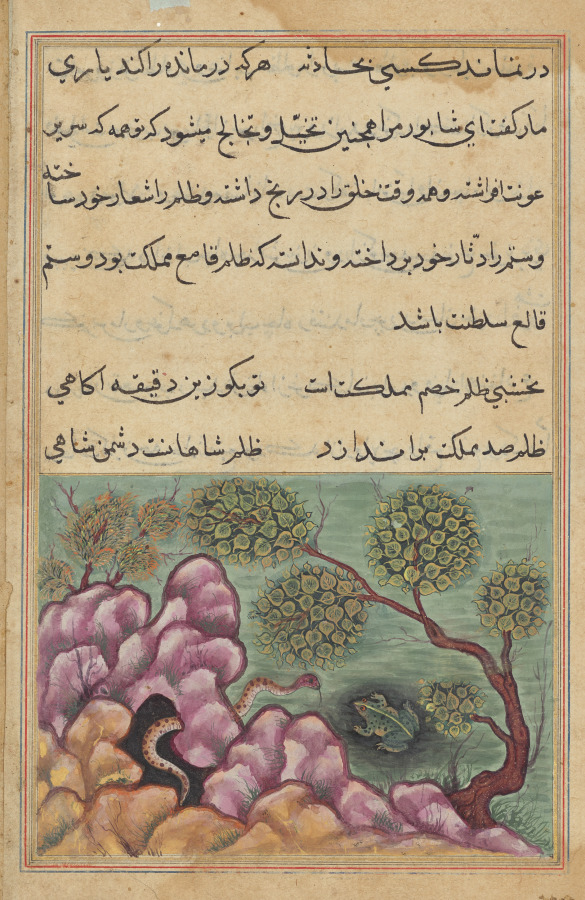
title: The dethroned frog Shapur seeks the help of the serpent, from a Tuti-nama (Tales of a Parrot): Twenth-sixth Night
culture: Mughal India, court of Akbar (reigned 1556–1605)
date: c. 1560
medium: gum tempera, ink, and gold on paper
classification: Painting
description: Shapur, who had long ruled as king of the frogs, was overthrown and exiled for cruelty. Seeking revenge on his political enemies, he sought the allegiance of a frog-eating serpent. The serpent’s lair is shown in cross section amid the heavily shaded rocks. A pipal tree (ficus religiosa), native to India, bends over the body of the frog. This story is set in China, and the emphasis on the layers of shaded rocks may suggest the artist’s impression of a Chinese landscape. Moreover, the snake’s markings appear to be those of a Chinese Mountain pit viper.